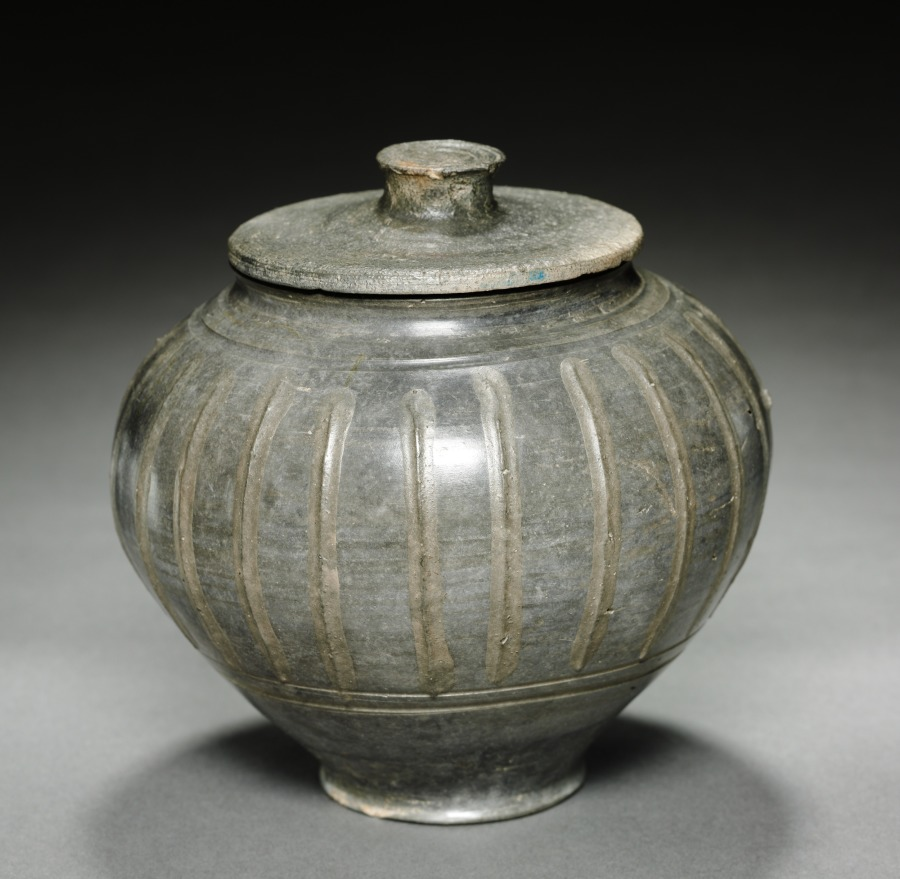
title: Pot with Cover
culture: Rhenish (Cologne), Gallo-Roman, 2nd century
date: 100–200 CE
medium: tan ware with gray and some brown burnished slip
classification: Ceramic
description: This elegant pot with its matching lid was made using a potter’s wheel, evident from the subtle horizontal rings that are visible across the belly of the vessel. The vertical ribs were added after the pot was removed from the wheel, using a thick clay paste. The vessel’s lid suggests that it was used for storage.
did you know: The shiny surface of this pot was made using a technique called burnishing, performed by polishing a surface with a hard, smooth object.